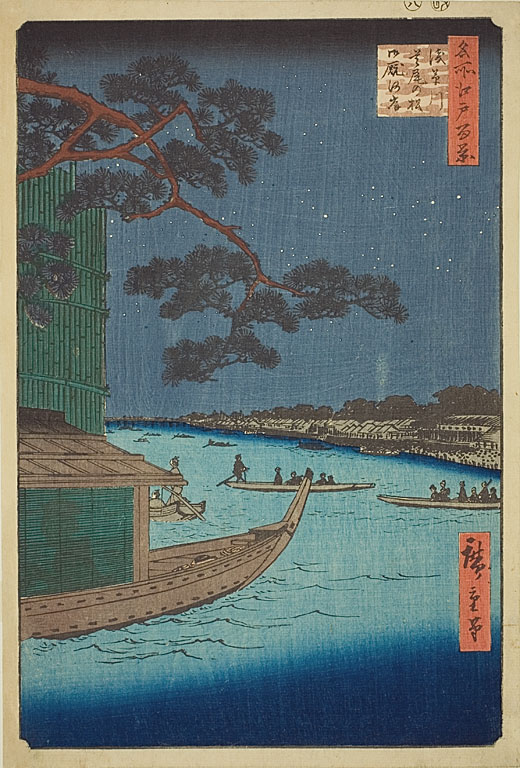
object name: Print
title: Pine of Success and Oumayagashi, Asakusa River (Asakusagawa Shubi no matsu Oumayagashi), No.61 from the series "One Hundred Famous Views of Edo (Meisho Edo hyakkei)"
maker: Utagawa Hiroshige (Japanese, 1797-1858)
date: 1856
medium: Color woodblock print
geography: Japan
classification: woodblock print; print; asian art